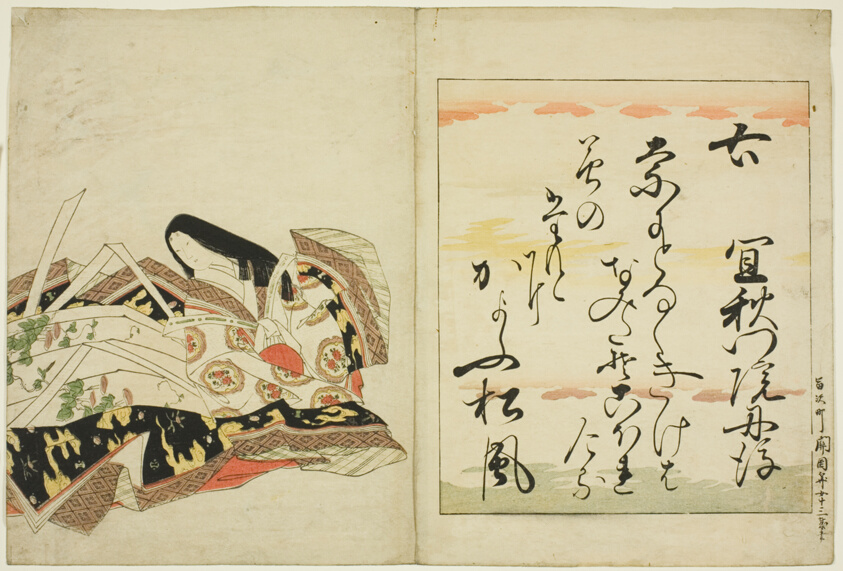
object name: Print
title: The Poetess Gishumon-in no Tango, from the series The Thirty-six Immortal Women Poets (Nishikizuri onna sanjurokkasen)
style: Japanese (culture or style)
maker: Chobunsai Eishi; Japanese, 1756-1829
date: Edo period (1615–1868), 1801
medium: Page from a color woodblock-printed volume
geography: Japan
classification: woodblock print; print; asian art